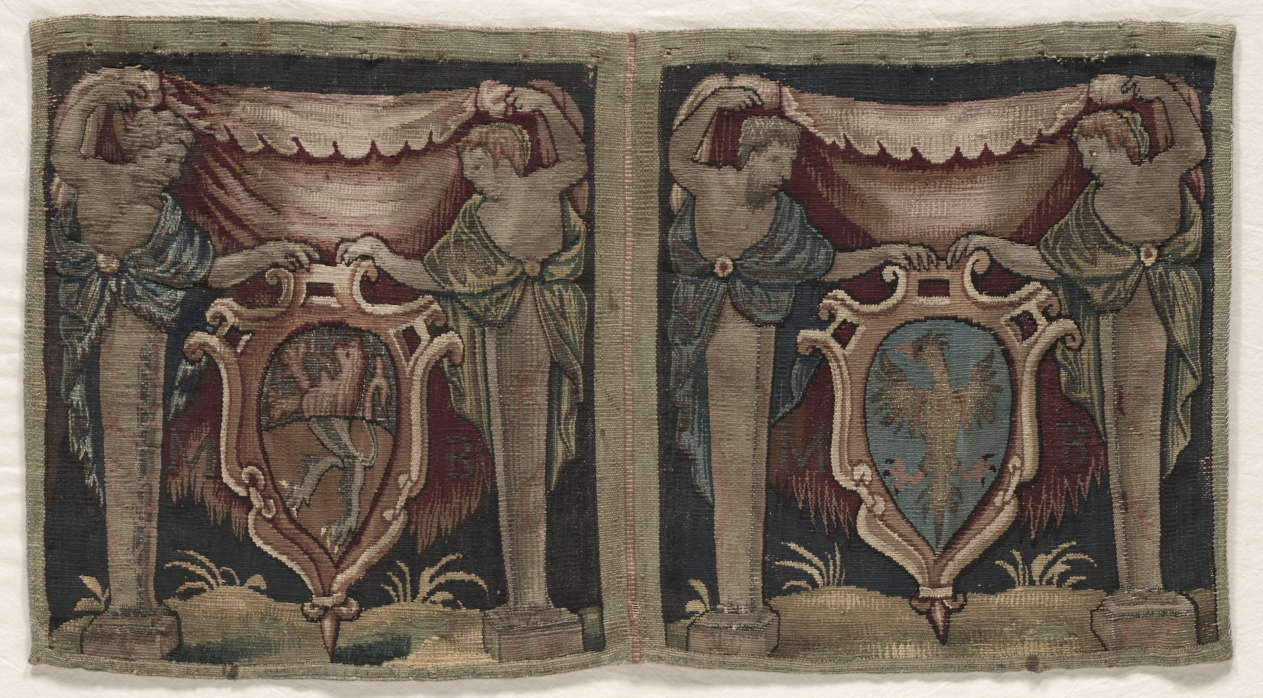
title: Fragment of Two-Sectioned Tapestry Border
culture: England ?, 16th century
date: 1500s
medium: tapestry weave: wool, silk, and gold filé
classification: Tapestry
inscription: in each section "M B" appears at the side of the two coat of arms.